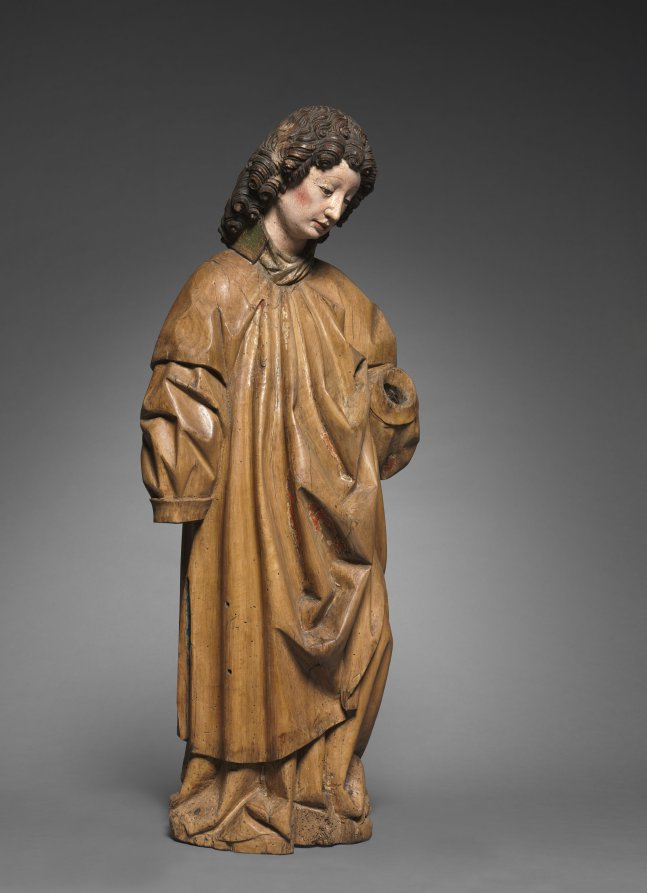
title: Saint Lawrence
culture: Austria, South Tyrol, late 15th century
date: c. 1490–1500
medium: lindenwood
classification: Sculpture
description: Lawrence of Rome (about 225–258 CE) was one of the seven deacons of ancient Rome martyred in 258 CE, and became one of the most widely venerated saints during the Middle Ages. According to tradition, he met his martyrdom by being roasted on a gridiron, an attribute which he either holds or stands upon in art. (See a depiction of him by Tilman Riemenschneider nearby in this gallery.) Lawrence is always portrayed as a young man wearing the deacon’s dalmatic. The original source and context of this sculpture is not known. Since it is not carved in the round, it was likely placed within the niche of a large altarpiece.